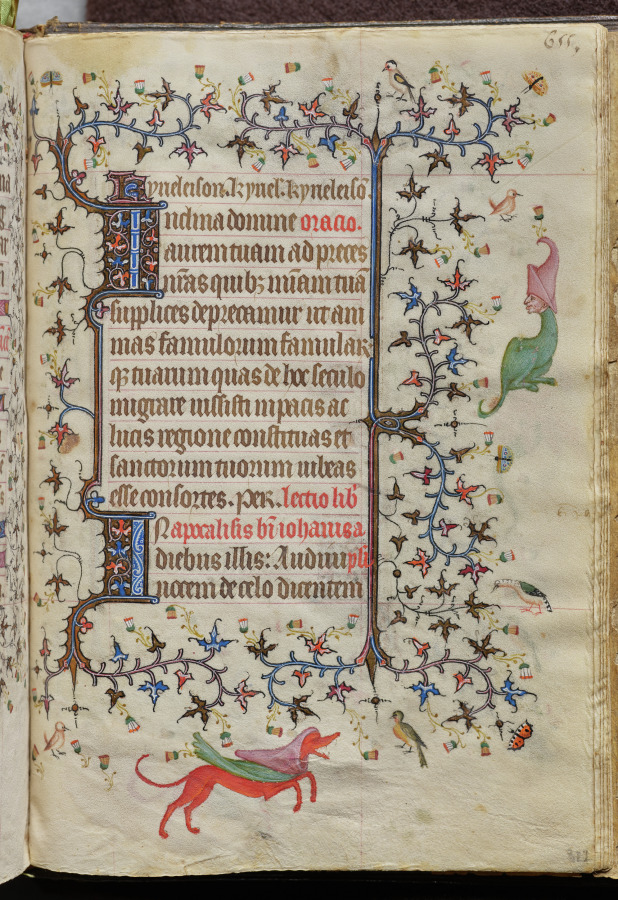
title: Hours of Charles the Noble, King of Navarre (1361-1425), fol. 322r, Text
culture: France, Paris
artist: Master of the Brussels Initials and Associates (French)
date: c. 1405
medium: ink, tempera, and gold on vellum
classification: Bound Volume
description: This precious volume was obviously highly prized by its owner, the French-born King of Navarre, who had his coat of arms painted on no less than twenty folios. Rather than directly commissioning this manuscript from a specific workshop, it seems that Charles the Noble acquired his book of hours -- perhaps ready-made for the luxury market -- while on a trip to Paris in 1404-05. A collaborative effort, six painting styles are evidenced within the pages of this codex, those of two Italians, two Frenchmen, and two Netherlanders. The painter who was responsible for the planning and decoration of the book, and who produced seventeen of the large miniatures, was a Bolognese artist known as the Master of the Brussels Initials. His principal assistant, responsible for most of the borders, was a Florentine who signed his name "Zecho" da Firenze on folio 208 verso.